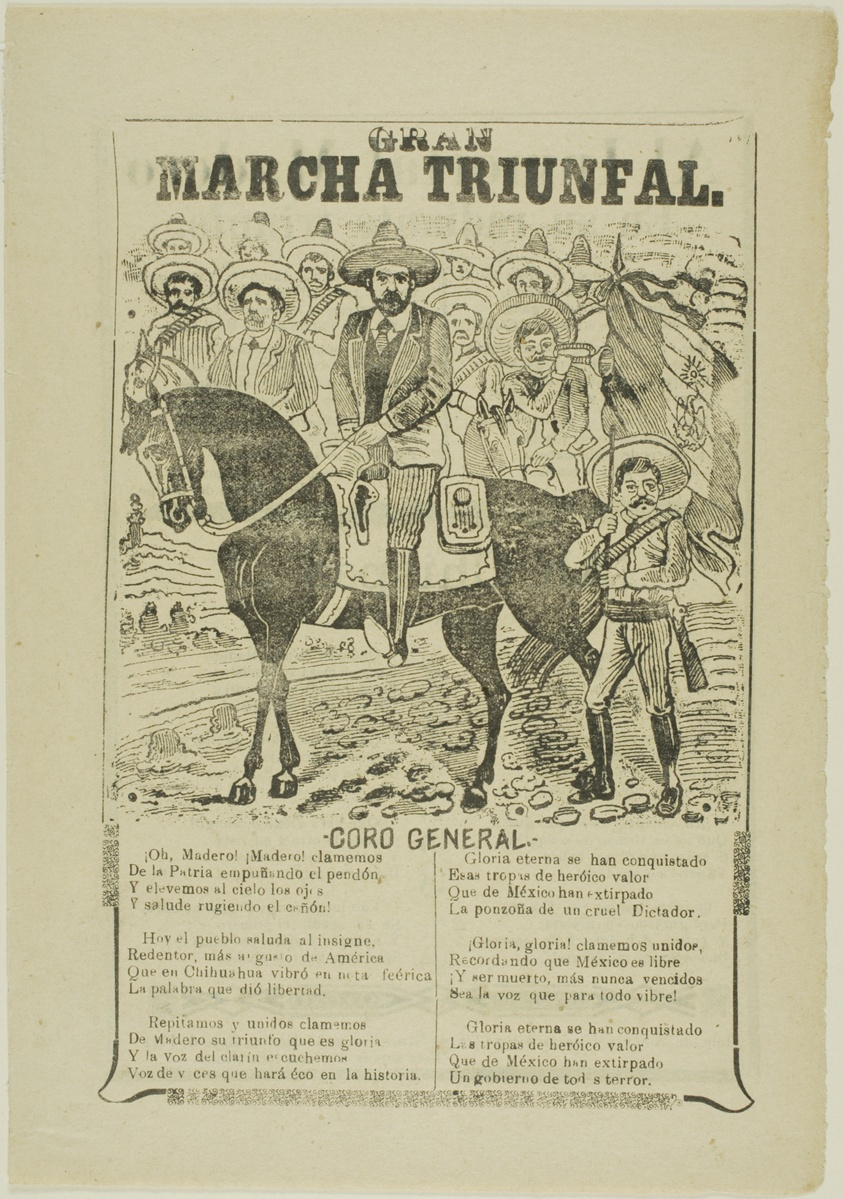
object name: Print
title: Great Triumphal March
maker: José Guadalupe Posada (Mexican, 1852-1913)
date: 1911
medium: Photo relief etching with engraving on wove paper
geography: Mexico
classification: relief etching; print; prints and drawing